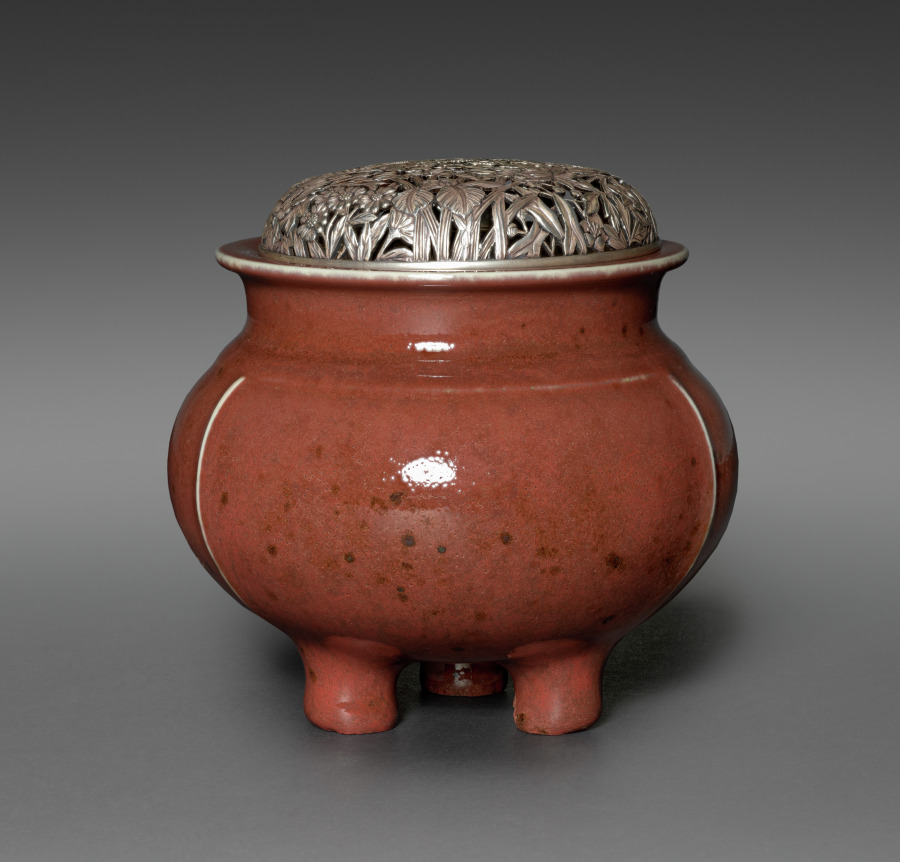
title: Incense Burner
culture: Japan, Meiji period (1868–1912)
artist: Seifū Yohei III (Japanese, 1851–1914)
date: 1893–97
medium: Porcelain with molded design, crimson glaze, and floral openwork silver lid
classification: Ceramic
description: Seifū Yohei III made incense burners in a wide variety of designs and styles. Their silver lids were produced outside the studio by metalwork specialists. This tripod incense burner has a distinctive red-colored glaze and linear molded decorations that run around the base of the collar and down the legs.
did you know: Seifū Yohei III’s incense burner with a variety of flowers on its lid has a glaze described as “crimson glaze” (kōyū); it is also dappled with dark spots of varied opacity and tiny pores throughout, which gives the container a rich, textured effect.